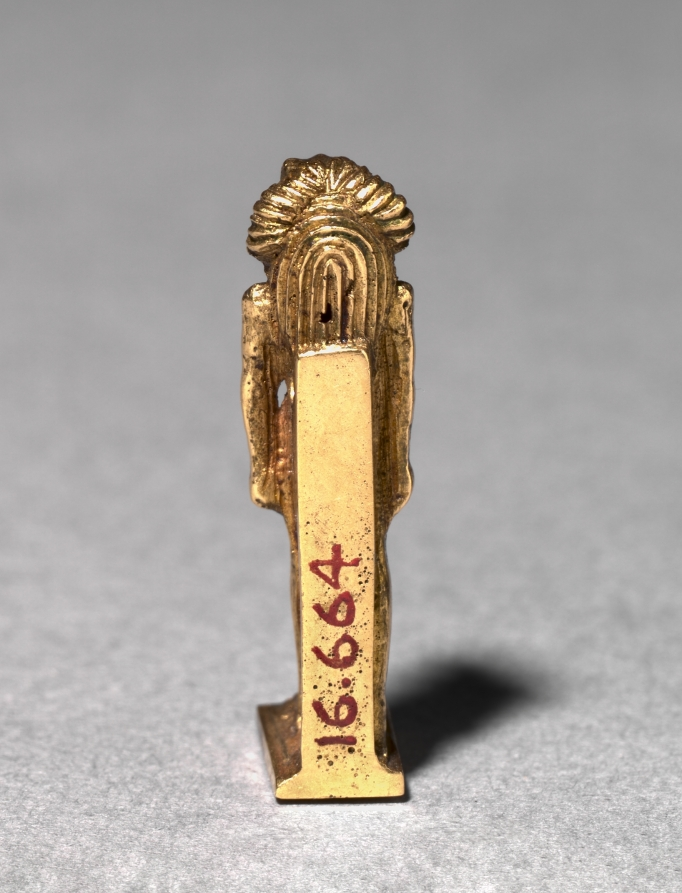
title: Amulet of a Ram-Headed Deity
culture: Egypt, Third Intermediate (1069–715 BCE), Dynasty 22 or later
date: c. 945–715 BCE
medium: gold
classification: Amulets